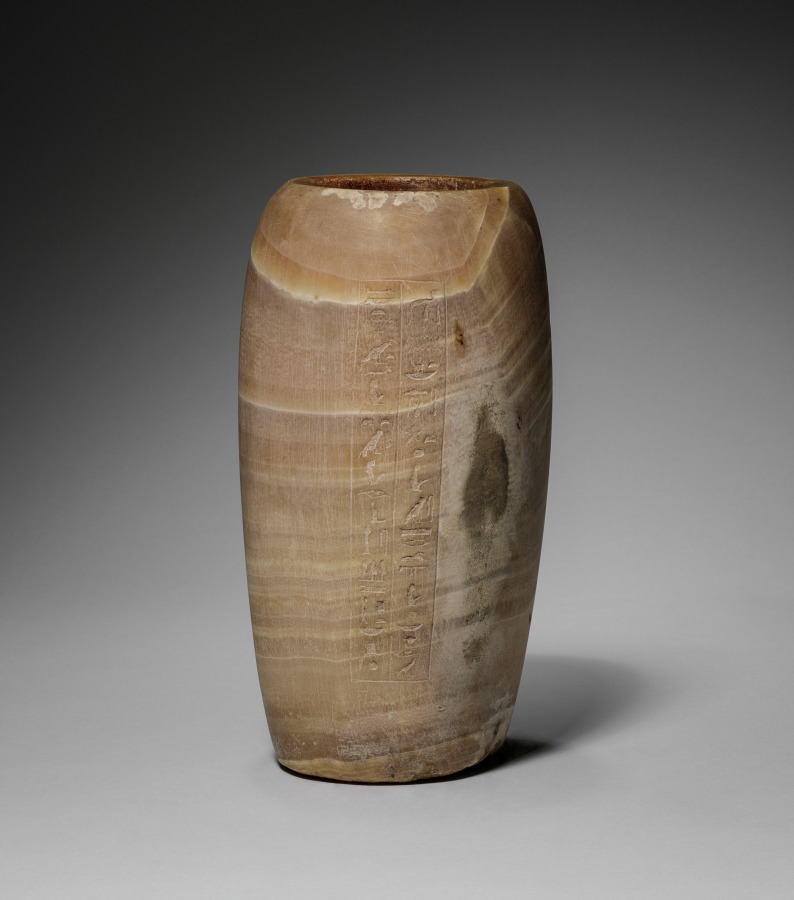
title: Canopic Jar with Man's Head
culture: Egypt, Late period (715–332 BCE), Dynasty 26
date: 664–525 BCE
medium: travertine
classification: Funerary Equipment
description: In the process of mummification, the liver, lungs, stomach, and intestines were removed, separately embalmed, and stored in specialized jars known as canopic jars (after a sailor in Greek mythology, who died at the town of Canopus in the Nile Delta and was worshipped there in the form of a human-headed jar). Each organ was identified with one of four funerary deities collectively known as the Sons of Horus: the liver with Imsety (man's head), the lungs with Hapy (baboon's head), the stomach with Duamutef (jackal's head), and the intestines with Qebehsenuef (falcon's head). It was their duty to protect the deceased and restore to him his body parts in the hereafter.